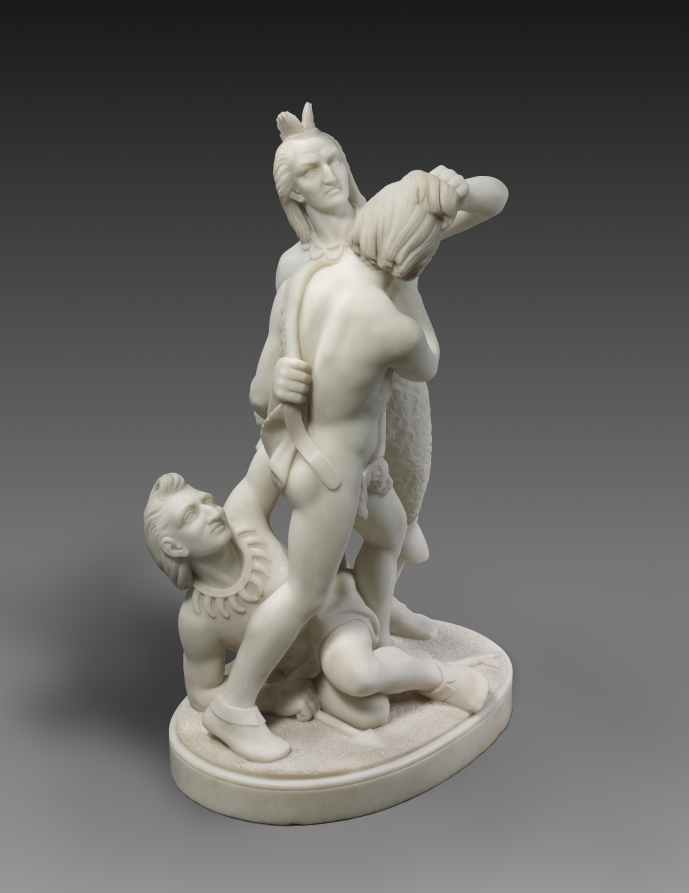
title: Indian Combat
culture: America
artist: Edmonia Lewis (American, c. 1844–1907)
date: 1868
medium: marble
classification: Sculpture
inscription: The base of the sculpture is inscribed: "EDMONIA LEWIS / FECIT A ROME 1868"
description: A spiraling composition with three intertwined figures, Indian Combat ranks as Edmonia Lewis’s most dynamic and complex creation. Although her Native American subjects typically exist in multiple versions, this example appears to be unique. Of Indigenous (Ojibwe) and African American ancestry, Edmonia Lewis studied at Oberlin College and apprenticed with a sculptor in Boston before moving to Rome in 1866. Her sculptures were readily purchased by patrons on both sides of the Atlantic.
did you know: Growing up in her Ojibwe community, Lewis went by a name that translates as "Wildfire."